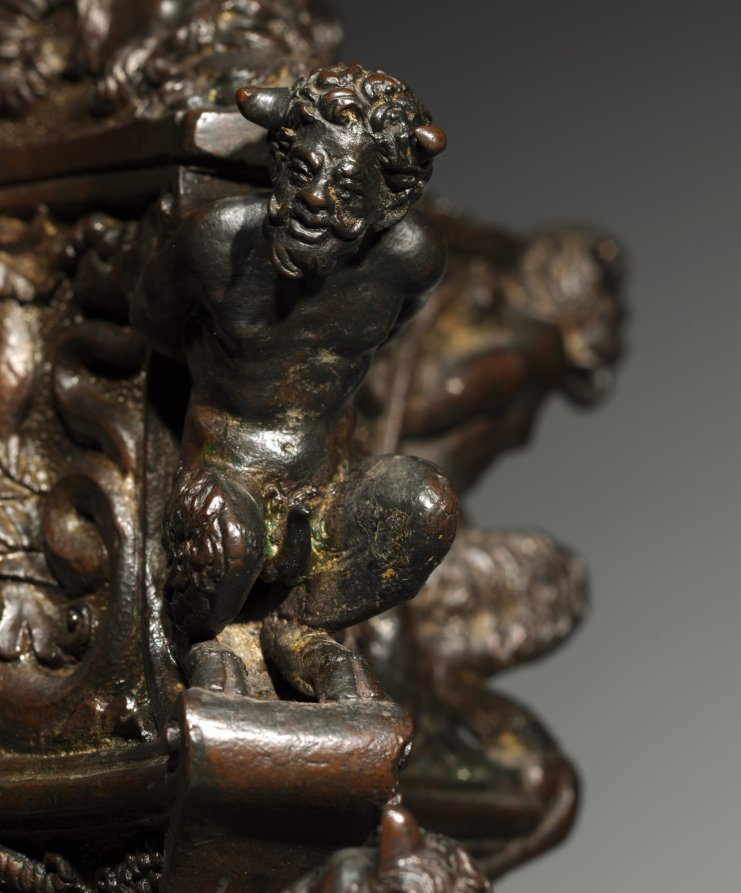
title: Paschal Candlestick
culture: Northern Italy, possibly Padua, 16th century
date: c. 1525–1550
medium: bronze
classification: Sculpture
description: In Roman Catholic practice, a large candlestick holds the Paschal Candle, blessed and lit for the first time on Easter eve, then used on significant occasions throughout the year. Despite its religious function, the decorations here are entirely secular-ranging from panthers and bound satyrs to the heads of raptors and goats. These elements derive from ancient Roman sculpture and were especially popular among intellectuals in northern Italy, who were actively exploring connections among pagan traditions, ancient philosophy, and Christianity.